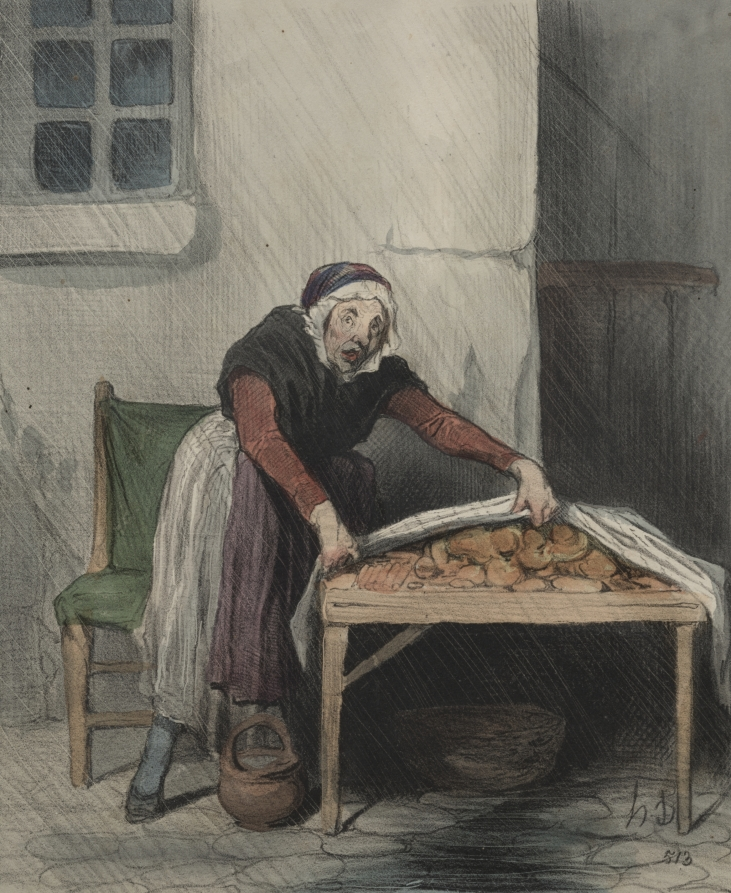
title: Every scalded fears cold water.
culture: France, 19th century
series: The Chapter of Interpretations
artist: Honoré Daumier (French, 1808–1879)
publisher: Aubert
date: 1843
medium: lithograph with hand-coloring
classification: Print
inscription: Lower margin, printed: Chez Aubert & Cie. de la Bourse, 29 / Imp. d'Aubert & Cie. ; Lower margin, in pencil: LD 1108 / HD 1069 / 110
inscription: Above image, printed: LE CHAPITRE DES INTERPRETATIONS. / 8. ; Below image, printed: V'là plus de six francs que je perds ce mois-ci par les averses:; on a bien raison de dire que: Chaque échaudé l'eau froide.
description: This print was published in Le Charivari (November 24, 1843) as plate 8 from the series The Chapter of Interpretations.